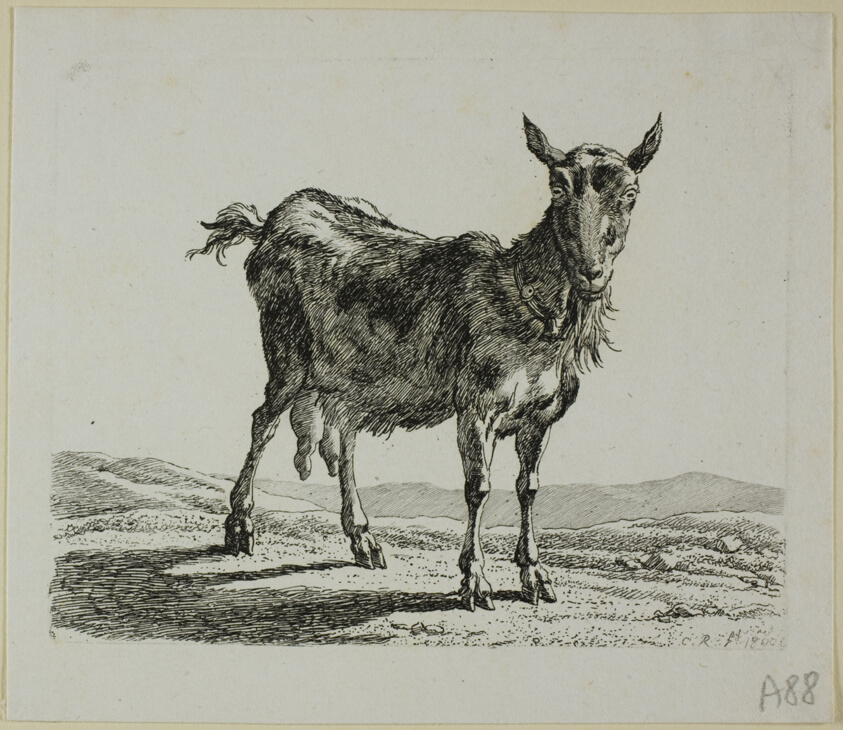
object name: Print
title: Standing Goat, from Die Zweite Thierfolge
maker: Johann Christian Reinhart (German, 1761-1847)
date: 1800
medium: Etching on ivory laid paper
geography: Germany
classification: etching; print; prints and drawing